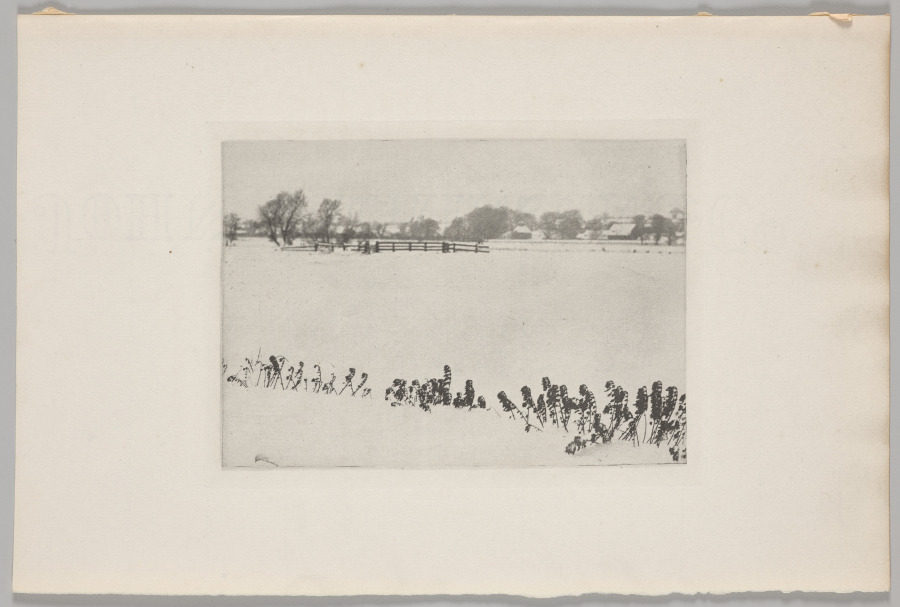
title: Marsh Weeds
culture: England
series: Marsh Leaves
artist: Peter Henry Emerson (British, 1856–1936)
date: before 1891, published 1895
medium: photogravure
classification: Photograph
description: Emerson’s early photographs emphasized naturalism, but his late works such as this one demonstrate influences from Japanese art, French Impressionism, and the painting and graphic art of Whistler, who was a personal acquaintance. This looser, more expressionistic, and emotional late style helped lay the groundwork for Pictorialist photography (for example, see 1980.141), the movement that succeeded in getting photography more widely accepted as a fine art.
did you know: Around the time Emerson made this image, one of his most artistic, he wrote that he no longer believed photography to be an art form.